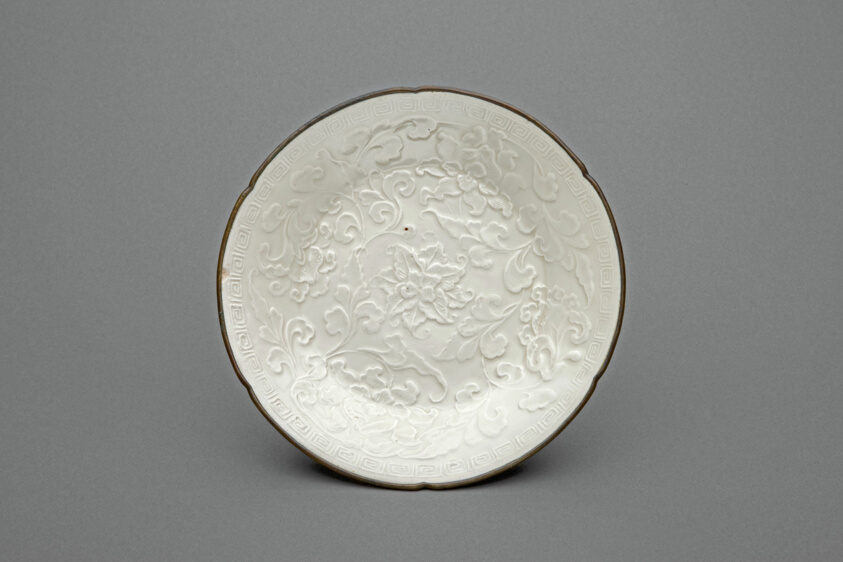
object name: Vessel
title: Lobed Dish with Stylized Peony Scrolls and Key-Fret Border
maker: China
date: Jin dynasty (1115–1234)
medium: Ding ware; porcelain with underglaze molded decoration and copper rim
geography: China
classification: decorative arts